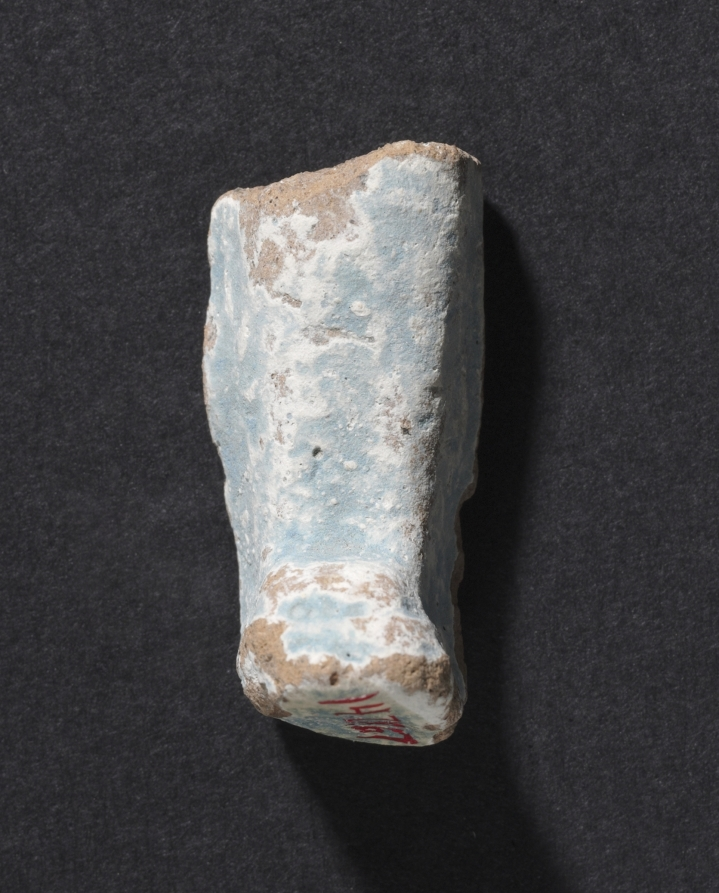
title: Shawabty of Ditamenpaankh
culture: Egypt, Late period (715–332 BCE), Dynasty 25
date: 715–656 BCE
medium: terracotta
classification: Funerary Equipment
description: High demand for shawabtys in the Late Period, a time when as many as 400 or more shawabtys were placed in the tomb with the deceased, gave rise to a specialized container for storing them: the shawabty box. This example is inscribed for the lady of the house, Ditamenpaankh, and was probably one of a pair originally made for her. The single-masted boat on the box's lid is perhaps an allusion to the pilgrimage of the deceased to the holy city of Abydos, the cult city of Osiris, king of the dead. The shawabtys inside are crude, mass-produced examples cast in an open mold. Made of terracotta, their blue paint imitates more costly shawabtys made of faience. As for the shawabty spell, it has been removed from its traditional location on the shawabty's front and relocated onto the sides of box, where it needed only to be written once, thus expediting production.